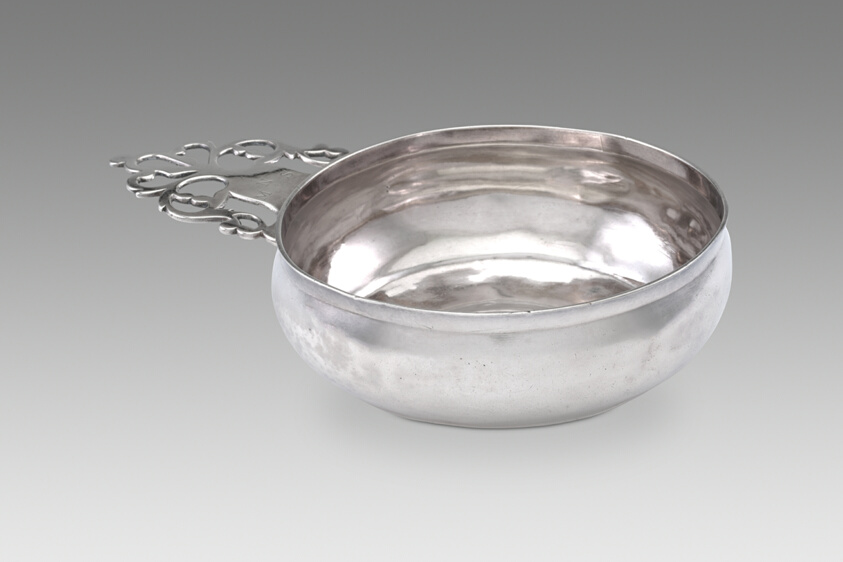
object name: Metalwork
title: Porringer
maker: Artist unknown (American, 18th century); New England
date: 1750–75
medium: Silver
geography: New England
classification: porringers (dishes); silver; vessel for serving food; dish (vessel); american decorative arts; american arts; decorative arts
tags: porringer